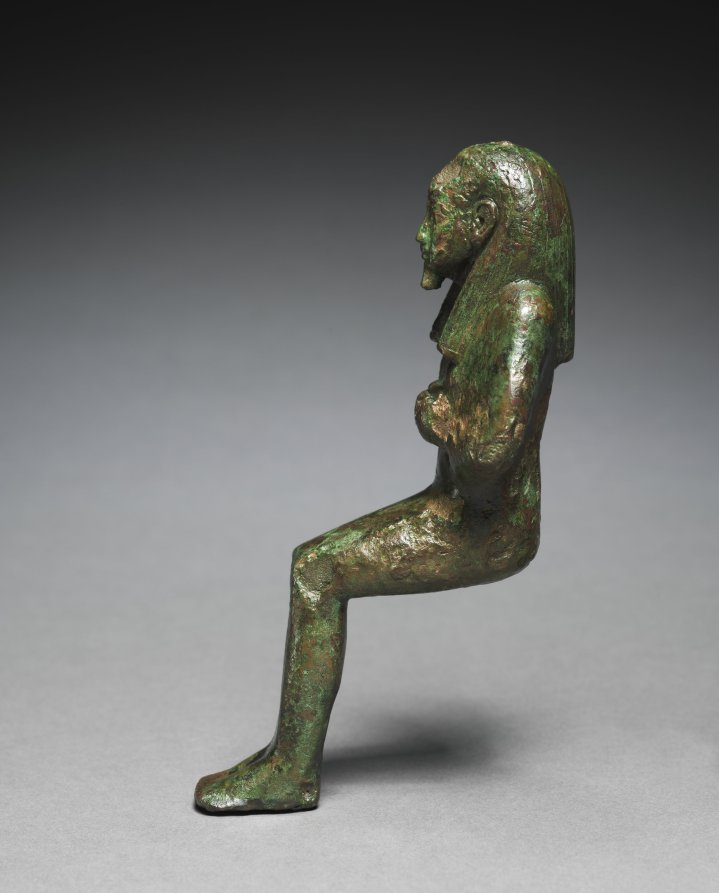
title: Statuette of Seated God, probably Osiris-lah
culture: Egypt, Late period (715–332 BCE), Dynasty 26 or later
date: 664–525 BCE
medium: bronze, solid cast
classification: Sculpture